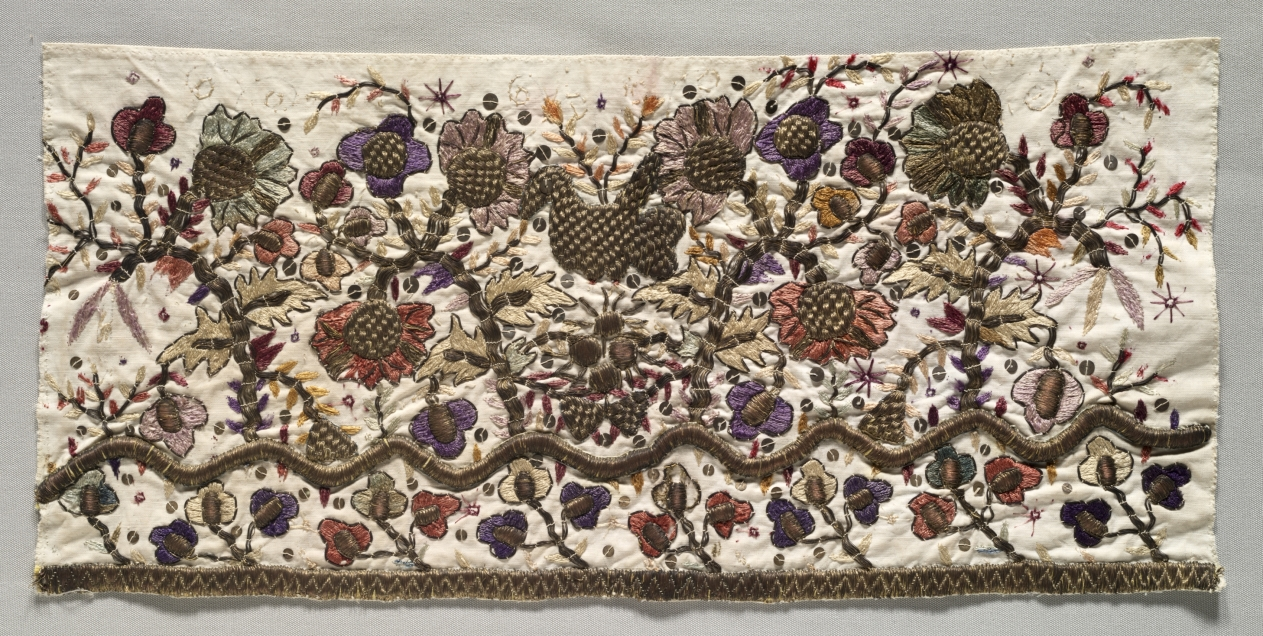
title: Embroidered Fragment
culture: Greece, 18th century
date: 1700s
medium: embroidery; silk and gold filé on cotton tabby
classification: Embroidery